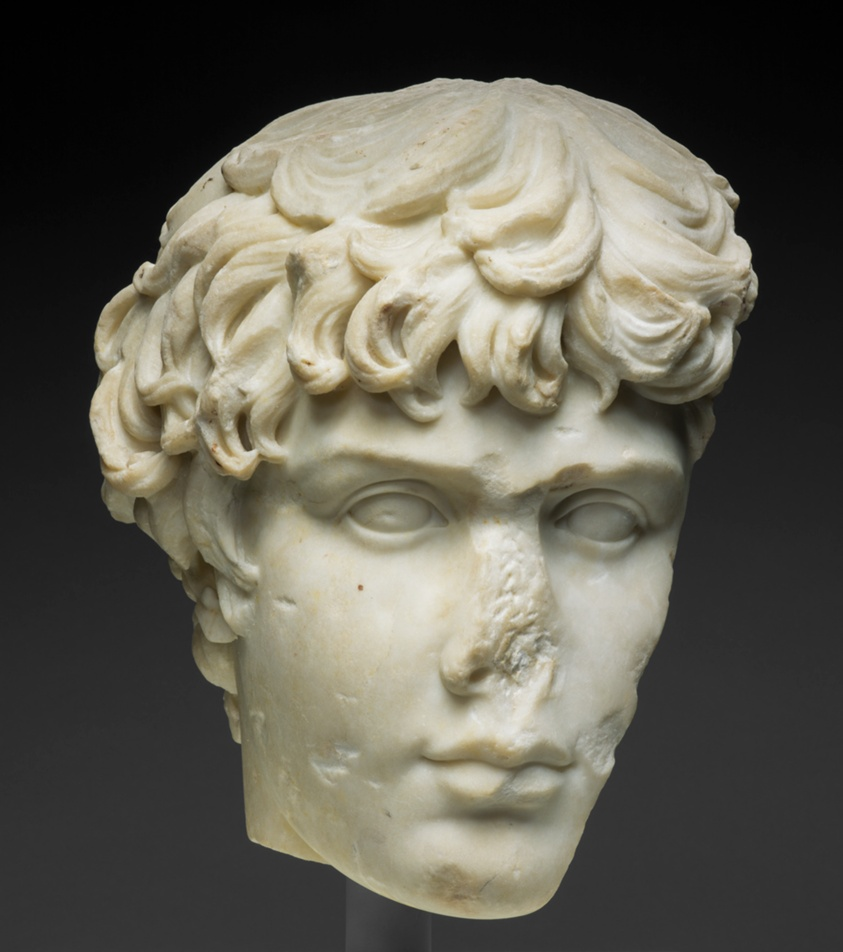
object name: Sculpture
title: Fragment of a Portrait Head of Antinous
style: imperial (roman), ancient, roman (ancient, style or period)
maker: Roman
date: 130-138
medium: Marble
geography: Italy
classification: marble; stone; sculpture; ancient art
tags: portraits